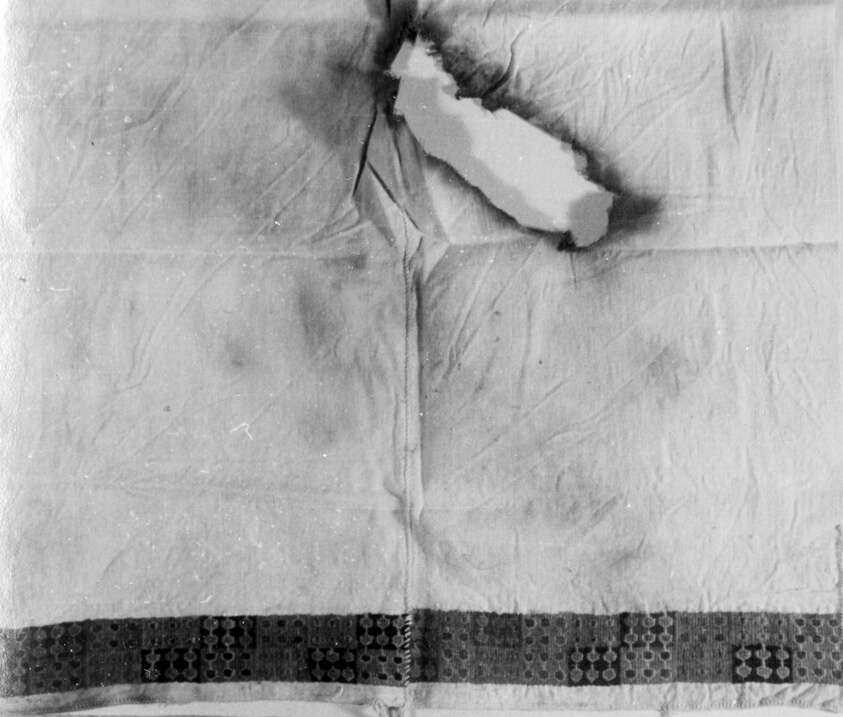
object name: Textile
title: Carrying Cloth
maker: Probably central coast, Peru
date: A.D. 1000/1476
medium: Plain cloth with tapestry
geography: Peru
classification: textile; weaving